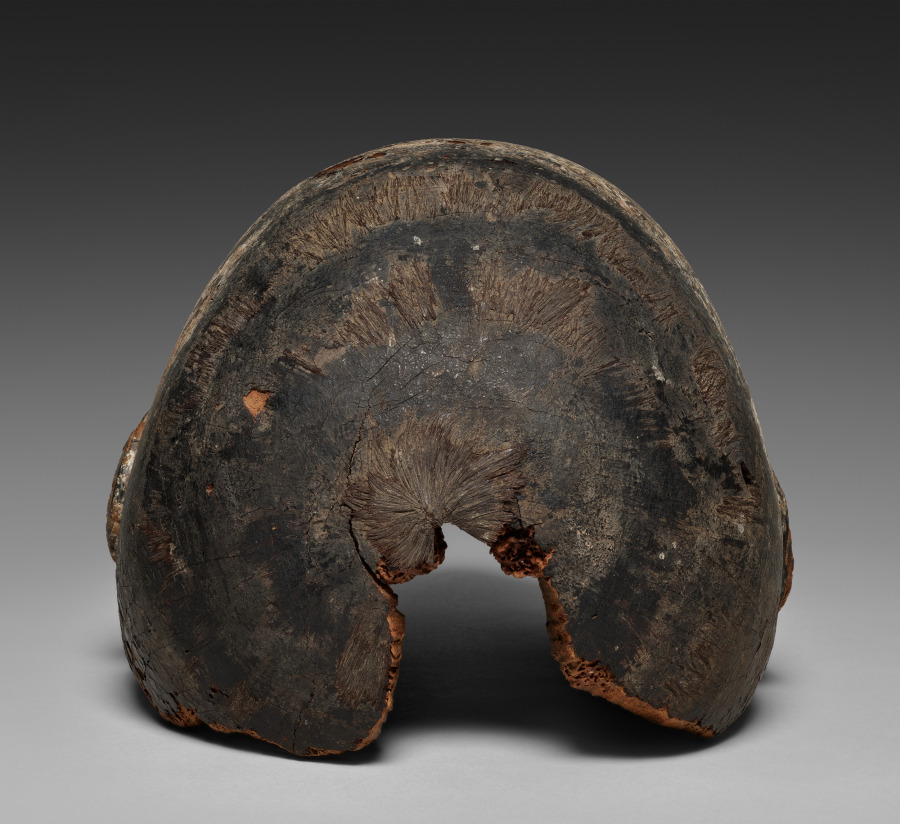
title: Gigaku Mask of Young Persian Boy (Taikōji)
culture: Japan, Nara period (710–94)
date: 710–94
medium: paulownia wood, lacquered and painted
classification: Sculpture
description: This mask is for the role of the son of an old Persian widower in gigaku, a theatrical dance repertoire imported to Japan from continental Asia during the seventh century. The old man and his sons mime prayers to the Buddha. While the mask would cover the entire head of the actor, there are openings for the eyes, nostrils, and mouth.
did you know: This is the mask for one of two sons who accompany a widower in ancient dance theater.